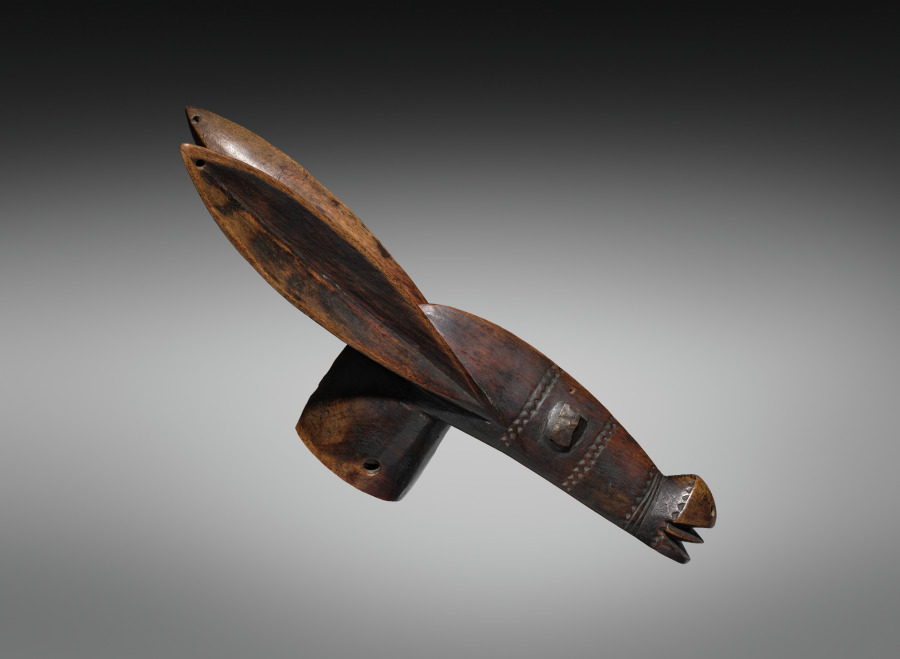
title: Head of a Hobbyhorse (korèdugaso)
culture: Africa, West Africa, Mali, Bamana blacksmith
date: late 1800s–early 1900s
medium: Wood and iron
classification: Sculpture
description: Pertaining to the male initiation society called Korè, this sculpture from the Koulikoro region represents the head of an aardvark and is part of a wooden hobbyhorse that is mounted by a ritual buffoon. The Korè initiates are divided into different classes, each having a designated mask. The ritual buffoons appear in pantomimes on different public occasions and poke fun at village authorities and other high-ranking individuals.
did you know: This is one of the best-known examples of a korèdugaso. It was featured on the catalogue cover for a 1935 exhibition at the Museum of Modern Art, one of the first on African arts in the US. It traveled to the CMA that same year.